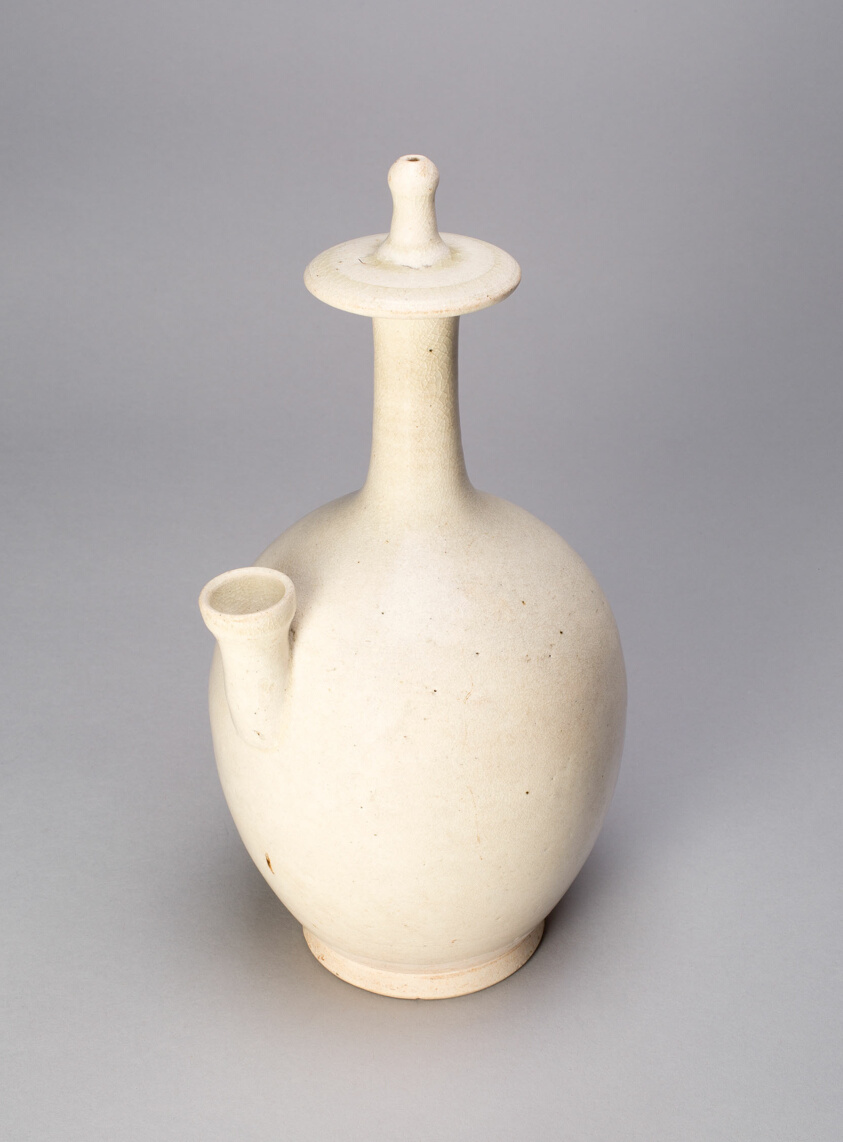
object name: Vessel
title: Buddhist Water Sprinkler (Kundika)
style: Chinese (culture or style)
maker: China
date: Tang dynasty (A.D. 618–907), 7th century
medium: Northern white ware; stoneware with yellowish-white glaze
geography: China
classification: stoneware; asian art; ceramics; vessel